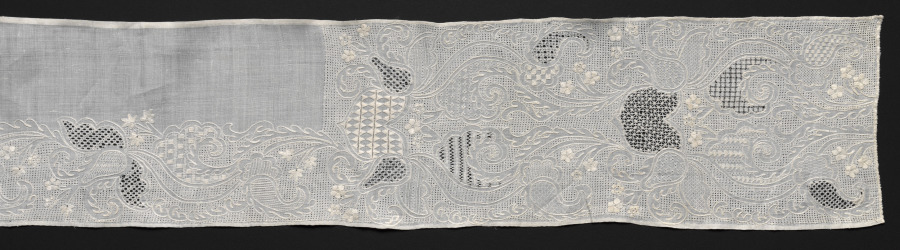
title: Embroidered Band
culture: France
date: 1800s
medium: Plain weave linen: needle lace (cutwork and drawnwork) and embroidery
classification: Embroidery